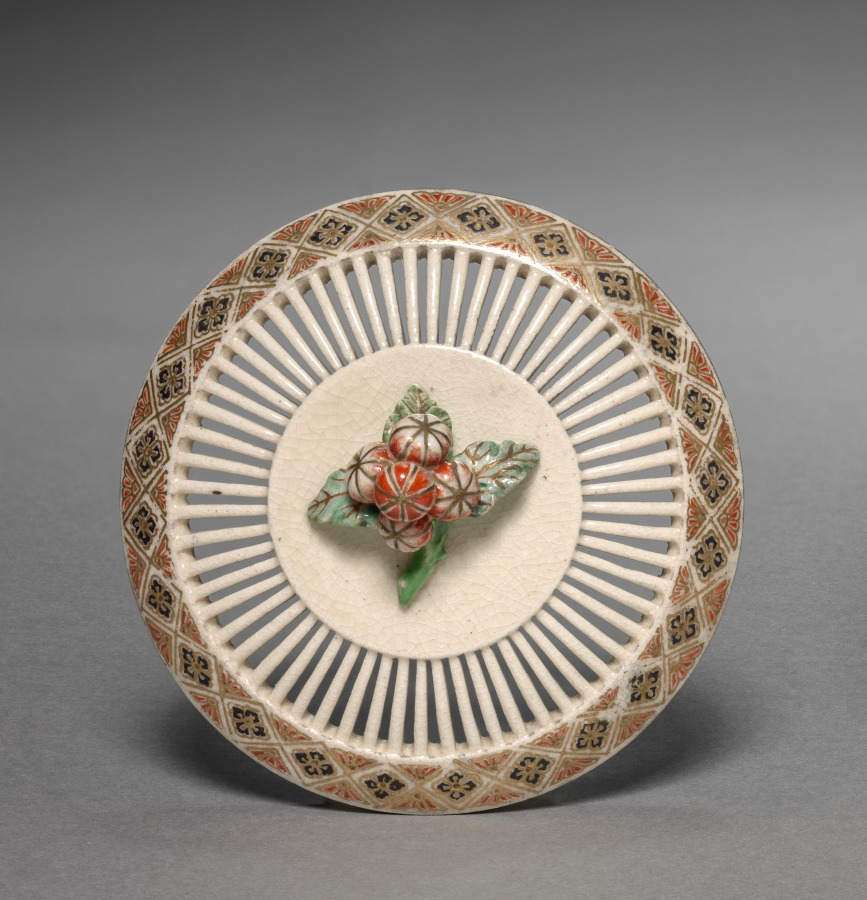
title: Jar (lid)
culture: Japan, Edo period (1615–1868)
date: early to mid-1800s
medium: pottery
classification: Ceramic